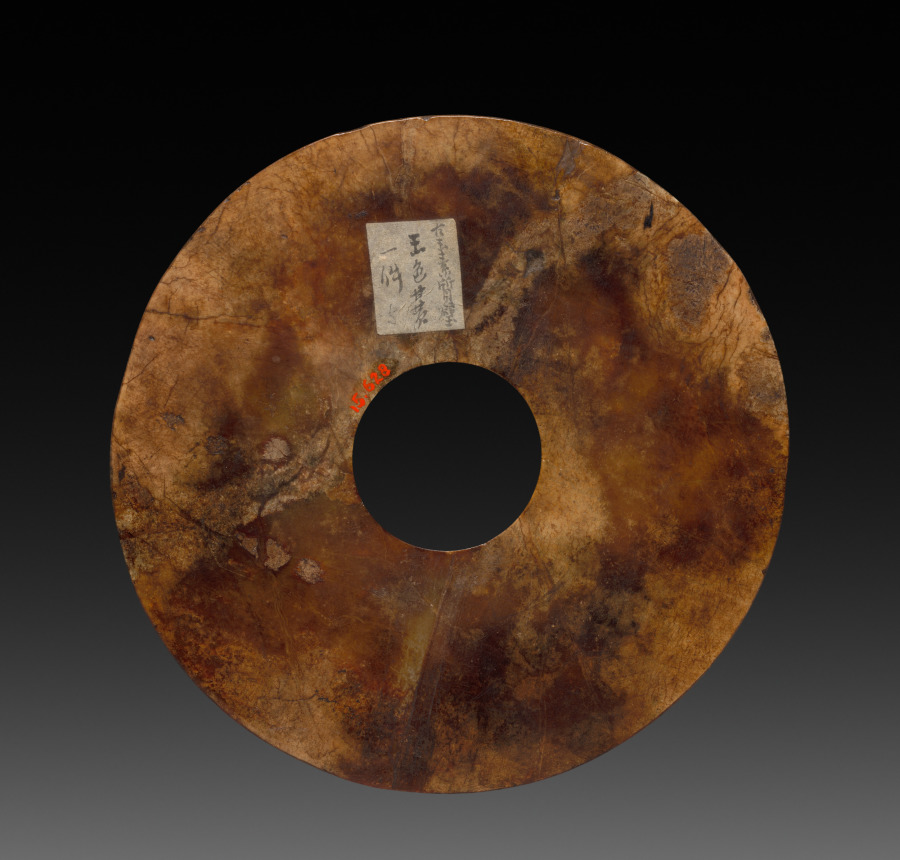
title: Perforated Disc (Pi)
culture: China, Neolithic period (3000s–2000s BCE)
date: 3000–2000 BCE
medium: jade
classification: Jade